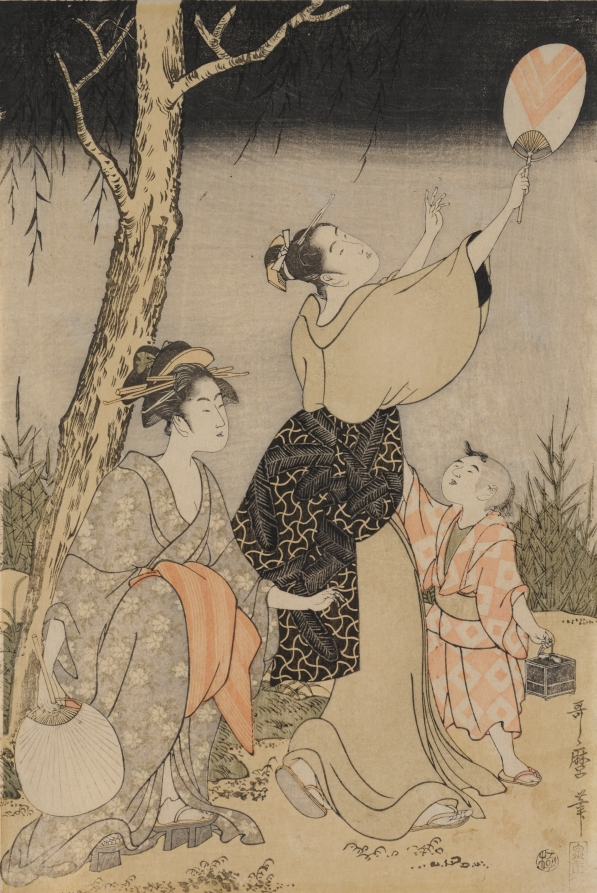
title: Catching Fireflies Beneath a Willow Tree (left)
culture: Japan, Edo period (1615–1868)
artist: Kitagawa Utamaro (Japanese, c. 1754–1806)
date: c. 1796–97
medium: Triptych: color woodblock print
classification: Print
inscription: Artist's signature: Utamaro hitsu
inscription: Publisher: Izumiya Ichibei (Senichi han). Censorship seal: kiwame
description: Caught up in a frenzied pursuit of fireflies, one boy has waded into a stream after his quarry, while a younger one watches in anticipation as a young woman thrusts her fan into the air in the hope of capturing hers. In the center of the composition, a girl examines the insects trapped in her elegantly carved cage.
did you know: A sense of movement is conveyed by their sleeves fluttering in the breeze.